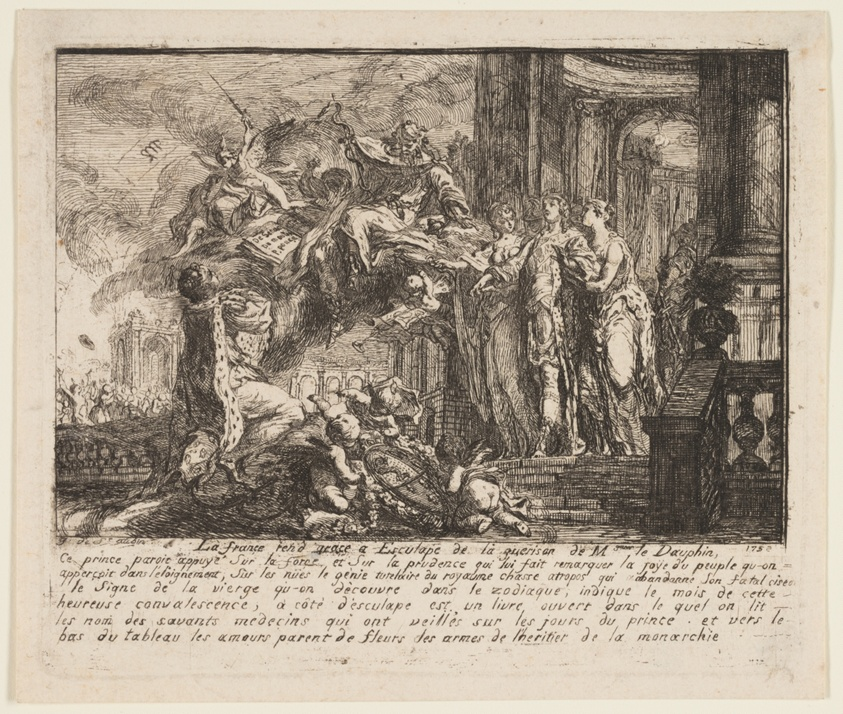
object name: Print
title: Allegory on the Convalescence of the Dauphin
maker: Gabriel Jacques de Saint-Aubin (French, 1724-1780)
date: 1752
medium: Etching in black on ivory laid paper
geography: France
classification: etching; print; prints and drawing